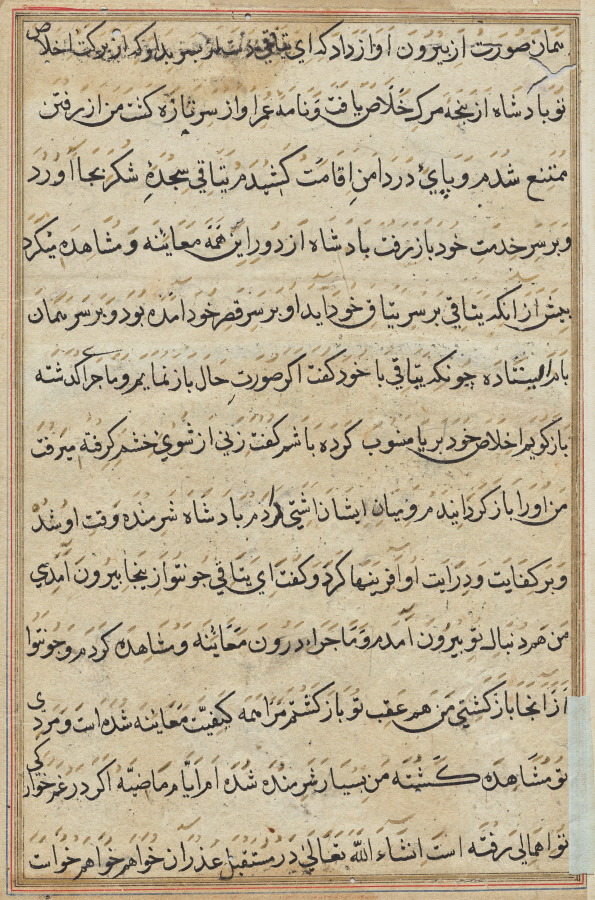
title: Page from Tales of a Parrot (Tuti-nama): text page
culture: Mughal India, court of Akbar (reigned 1556–1605)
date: c. 1560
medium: gum tempera, ink, and gold on paper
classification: Painting